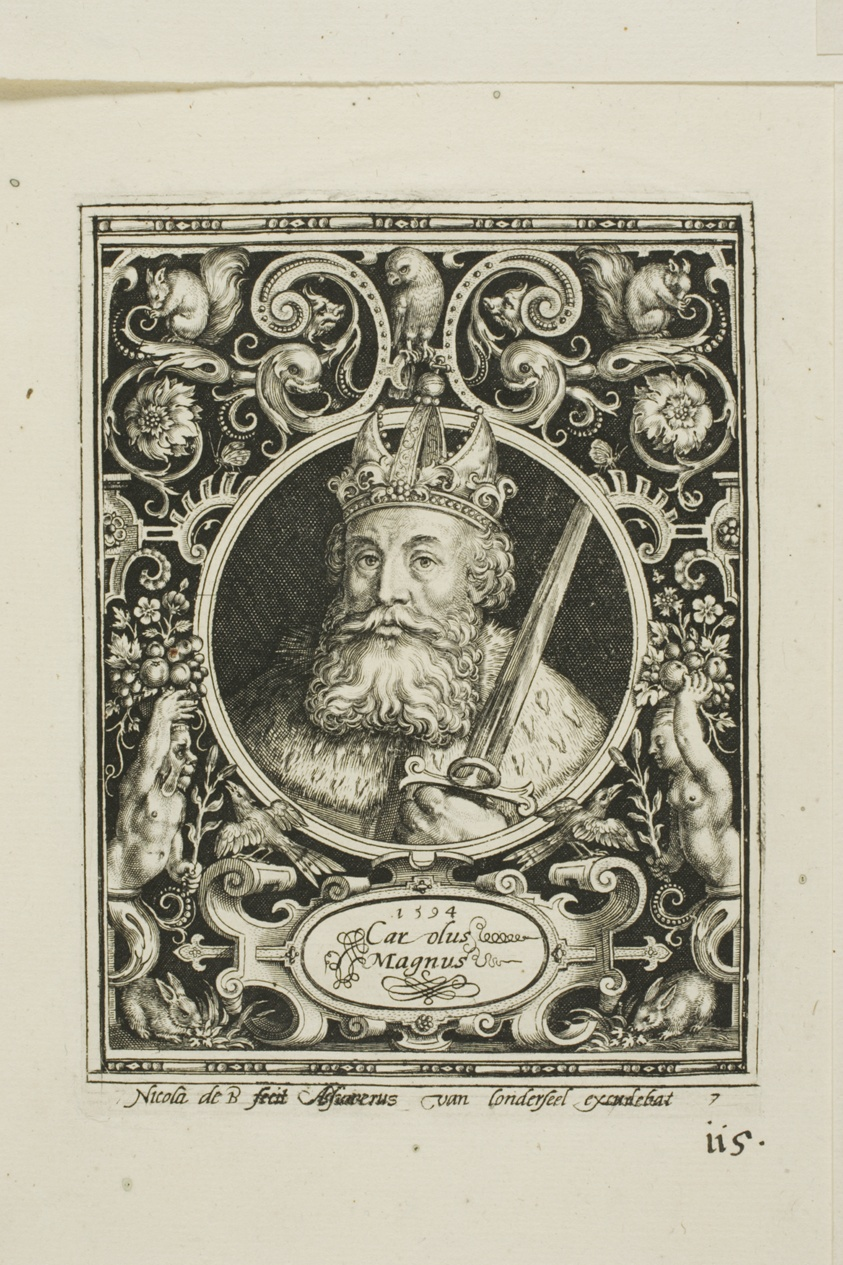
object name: Print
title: Charlemagne, plate seven from The Nine Worthies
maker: Nicolaes de Bruyn (Flemish, 1571-1656); published by Assuerus van Londerseel (Flemish, 1572-1635)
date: 1594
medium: Engraving in black on cream laid paper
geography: Flanders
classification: engraving; prints and drawing; print